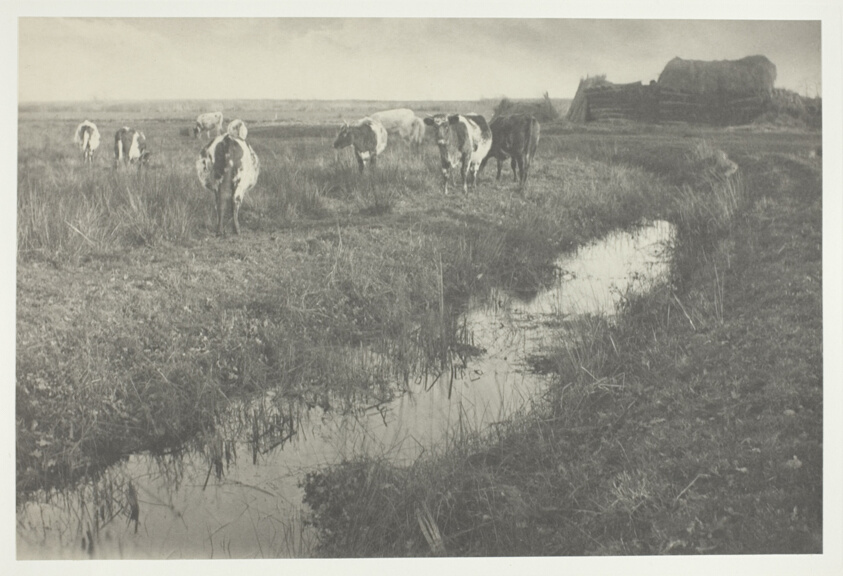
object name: Photograph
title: Cattle on the Marshes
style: 19th century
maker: Peter Henry Emerson (English, born Cuba, 1856–1936)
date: 1886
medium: Platinum print, pl. XXX from the album "Life and Landscape on the Norfolk Broads" (1886)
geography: England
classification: platinum print; photographic process; photography; photograph